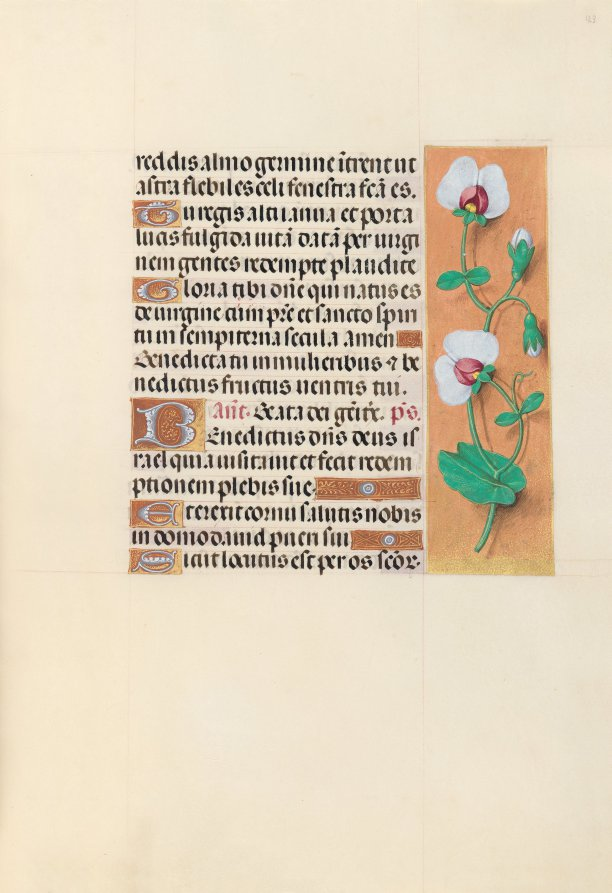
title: Hours of Queen Isabella the Catholic, Queen of Spain: Fol. 123r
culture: Flanders, Ghent and Bruges, late 15th century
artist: Master of the First Prayerbook of Maximillian (Flemish, c. 1444–1519)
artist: and Associates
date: c. 1500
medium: ink, tempera, and gold on vellum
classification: Bound Volume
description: This manuscript was illuminated by a circle of at least five highly organized manuscript painters active in the Flemish cities of Ghent and Bruges. The principal illuminator was Alexander Bening, who painted the majority of the book's miniatures. Manuscripts produced by this circle of artists are renowned for the decoration of their borders, which typically feature a rich variety of realistically-painted flowers, birds, and butterflies. This prayer book, called a book of hours, was intended not for a cleric, but for the private devotions of a lay person-in this case, Isabella the Catholic, Queen of Spain (1451-1504). Isabella's coat of arms embellishes the book's frontispiece. It is unlikely that the book was commissioned by the Queen herself; rather, she probably received it as a diplomatic gift from someone courting her patronage, perhaps Cardinal Francisco Jimenez de Cisneros. A Franciscan friar, Jimenez was dependent upon Isabella for his advancement, first to the post of Queen's confessor in 1492, and then to Archbishop of Toledo in 1495.